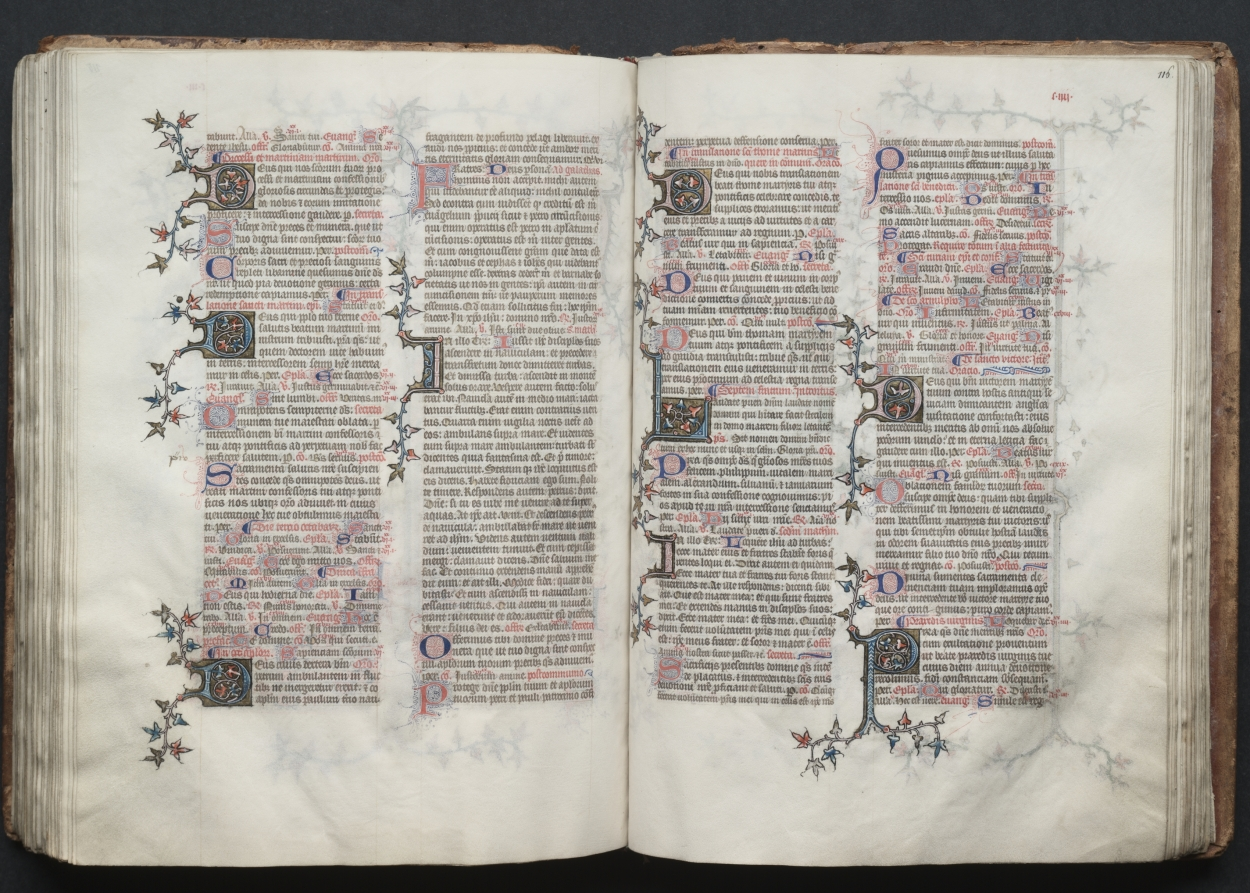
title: The Gotha Missal: Fol. 115v, Text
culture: France, Paris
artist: Master of the Boqueteaux (French)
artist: and Workshop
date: c. 1375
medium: ink, tempera, and gold on vellum; blind-tooled leather binding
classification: Bound Volume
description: The style and quality of this manuscript's decoration is typical of deluxe Parisian books made for aristocratic or royal patrons. Most of the book's decoration appears to be the work of the Master of the Boqueteaux, an artist active at the court of King Charles V (died 1380). His style was apparently shared by a number of book illuminators working in and around Paris. It is very possible that the Gotha Missal belonged to Charles V, but is not provable because the manuscript has no royal portraits and lacks a colophon. Given the book's magnificent decoration, however, it would seem that it was produced for a Valois prince, if not for the king himself. The manuscript receives its name from the German dukes of Gotha, its later owners.